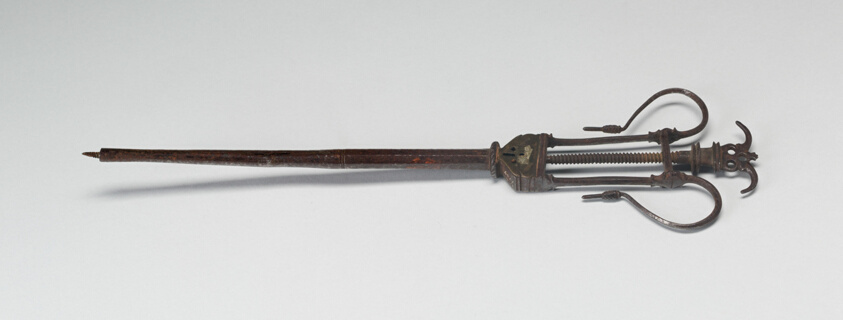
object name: Metalwork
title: Surgeon's Probe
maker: Europe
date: 17th century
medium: Steel and brass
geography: Europe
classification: tool; european decorative arts; metalwork